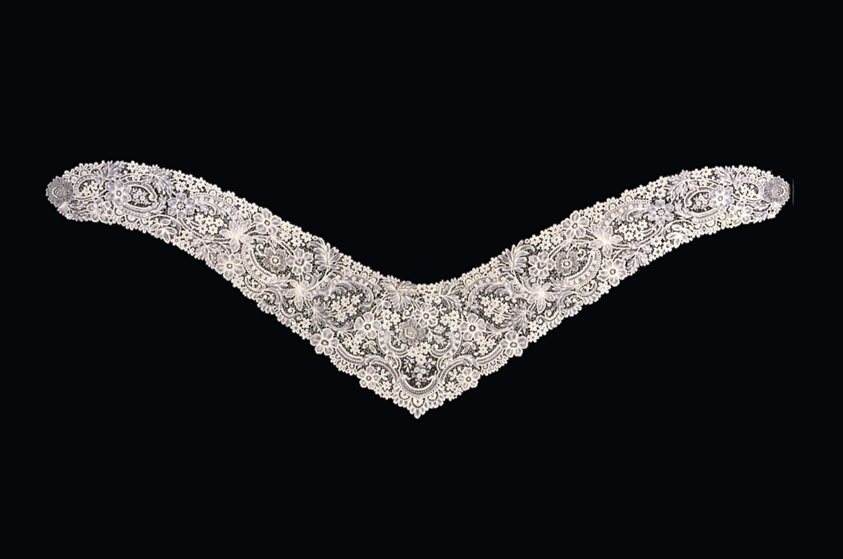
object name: Textile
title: Collar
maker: Belgium, Brussels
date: 1885/1900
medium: Cotton, mixed lace: bobbin lace of a type known as "Duchesse" with insets of needle lace of a type known as "Point de Gaze"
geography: Brussels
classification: textile; lace - mixed